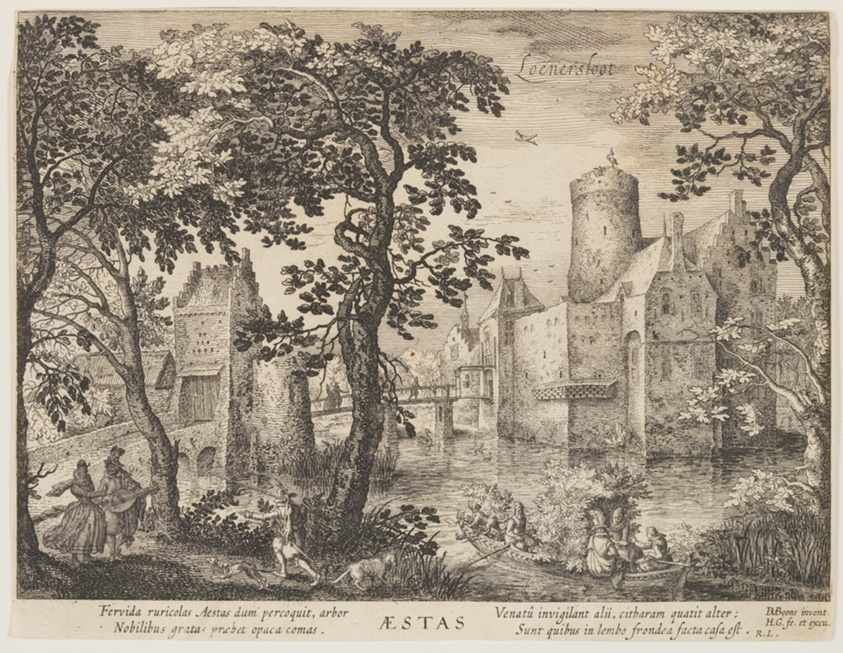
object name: Print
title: Loenersloot - Summer, from The Seasons, View of Castles in the Vicinity of Amsterdam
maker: Hessel Gerritsz (Dutch, 1581–1632); after David Vinckboons (Netherlandish, 1576–1629)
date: 1610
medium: Engraving on ivory laid paper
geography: Netherlands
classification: engraving; paper; print; prints and drawing